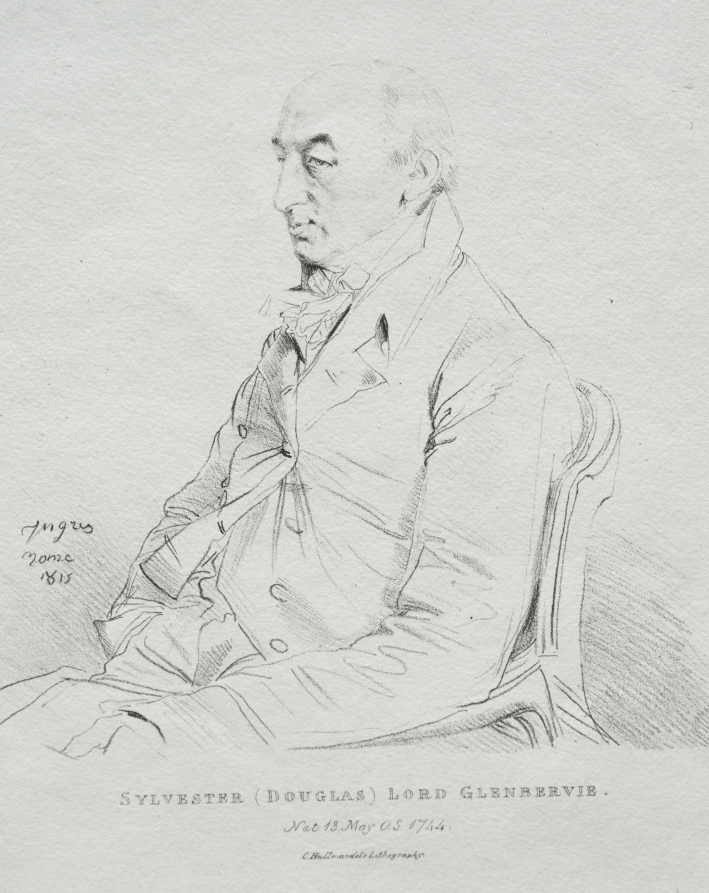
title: Sylvester Lord Glenbervie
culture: France, 19th century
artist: Jean-Auguste-Dominique Ingres (French, 1780–1867)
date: 1815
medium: lithograph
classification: Print